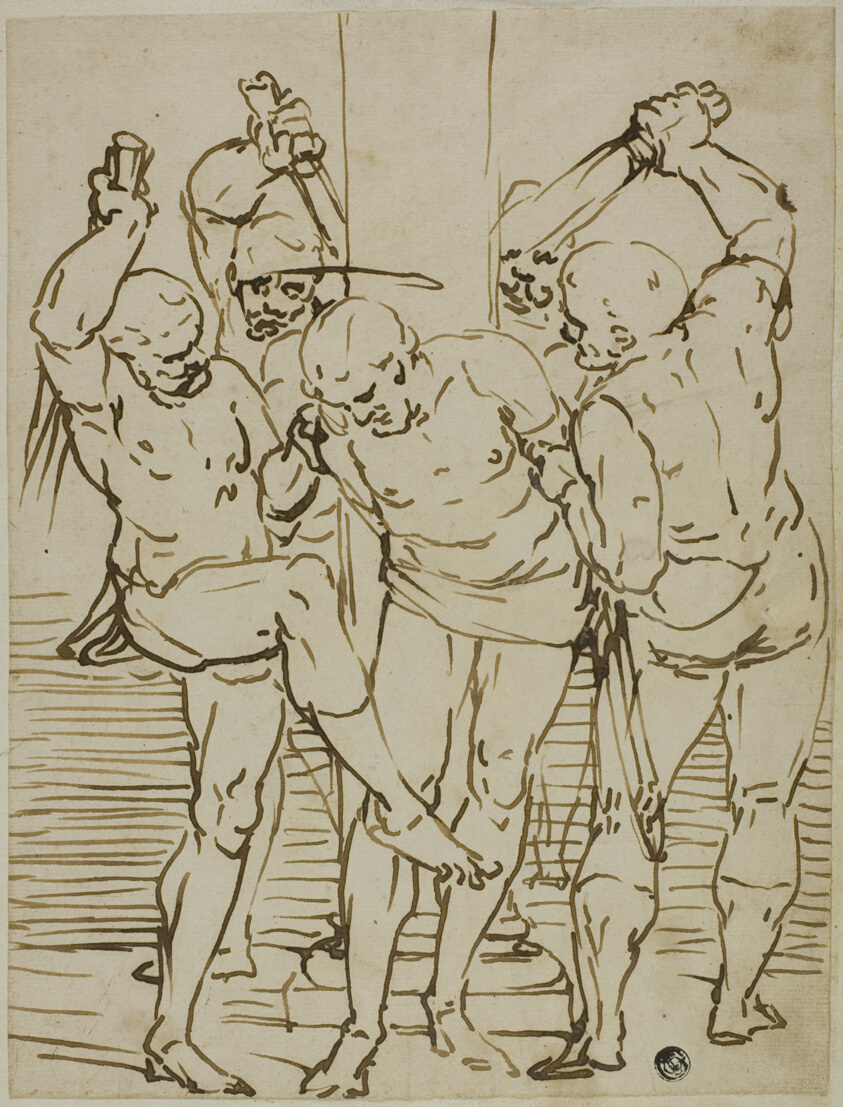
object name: Drawing and Watercolor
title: Flagellation of Christ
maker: School of Luca Cambiaso (Italian, 1527-1585)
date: 1570/90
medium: Pen and brown ink on ivory laid paper, laid down on ivory laid paper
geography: Italy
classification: pen and ink drawings; drawings (visual works); prints and drawing